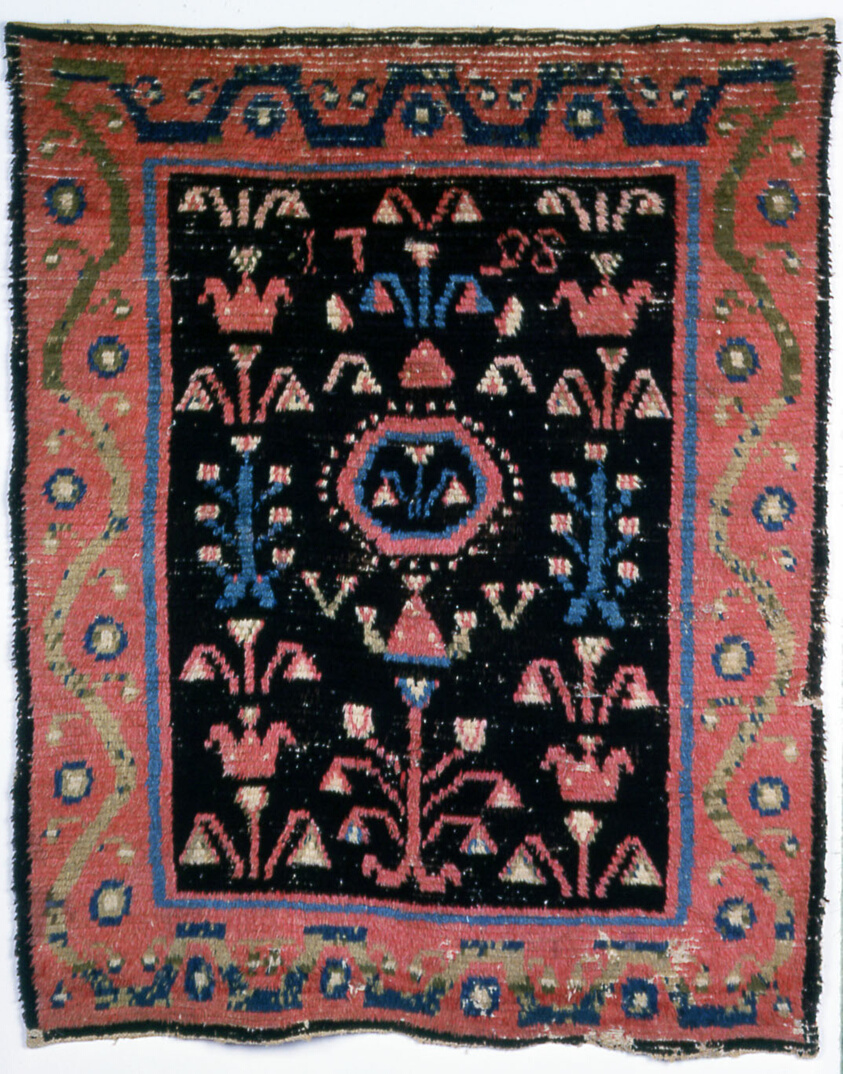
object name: Textile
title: Carpet known as a "Ryijy" or "Rya"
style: Folk Art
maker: Finland, Nummi, Hyrsylä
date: 1798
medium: Wool, weft-faced warp-rib plain weave with supplementary wrapping weft forming cut pile through a technique known as "Ghiordes knots"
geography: Finland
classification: textile; weaving - carpet